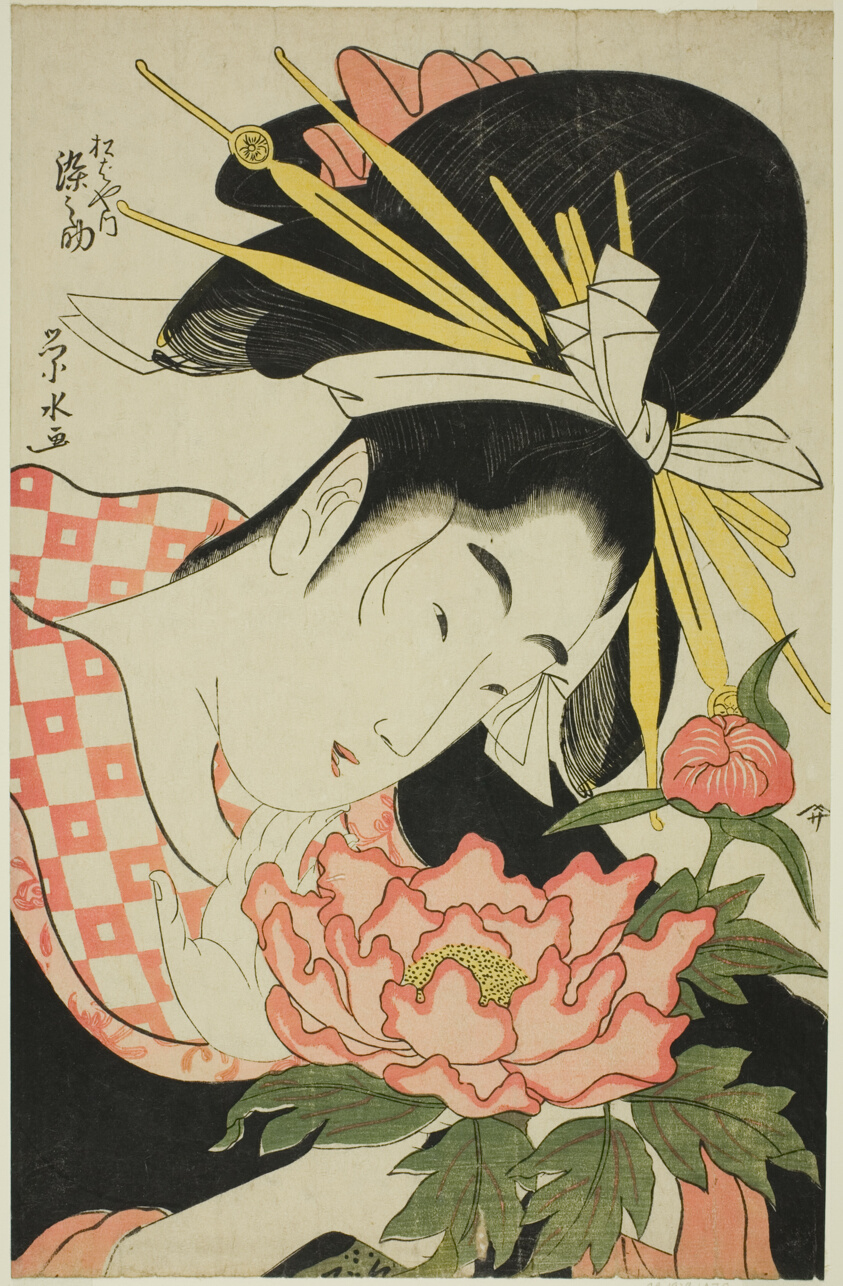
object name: Print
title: The Courtesan Somenosuke of the Matsubaya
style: Japanese (culture or style)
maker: Ichirakutei Eisui (Japanese, active 1790-1823)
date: c. 1797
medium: Color woodblock print; oban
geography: Japan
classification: woodblock print; print; asian art